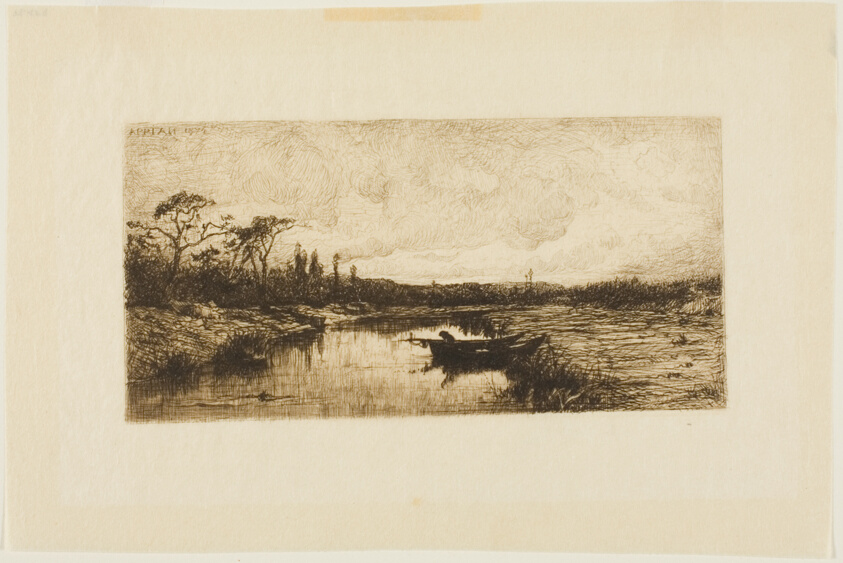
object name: Print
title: An Autumn Evening: Near Rossillon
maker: Adolphe Appian (French, 1818-1898)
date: 1874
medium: Etching on ivory Japanese paper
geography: France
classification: etching; print; prints and drawing